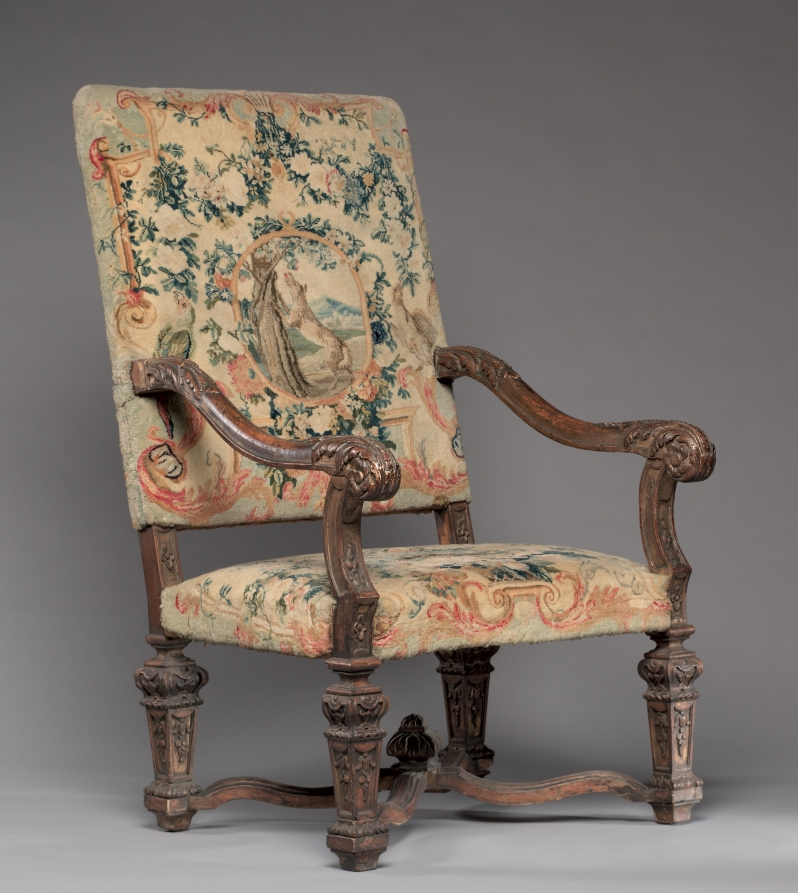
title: Armchair (3 of 4)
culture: France, 18th century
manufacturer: Royal Savonnerie Manufactory, Chaillot Workshops (French, est. 1627)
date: before 1717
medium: carved wood, Savonnerie knotted-pile (symmetrical rug knot) upholstery; wool, hemp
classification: Furniture and woodwork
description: These chairs belong to a suite that includes a settee (also in the CMA’s collection) and a tapestry made for a count and countess to mark their wedding in 1717. Furniture of this scale was usually placed against the wall in grand reception halls, more as a display of wealth than for use. Upholstered in Savonnerie tapestries, this suite was among the most treasured and expensive example anyone could own and typically reserved for royalty. To add decorative and intellectual interest to the textiles, weavers incorporated symbols depicting various stories from the Fables of Jean de La Fontaine, published from 1668 to 1694 and largely adapted from Aesop and other early storytellers.